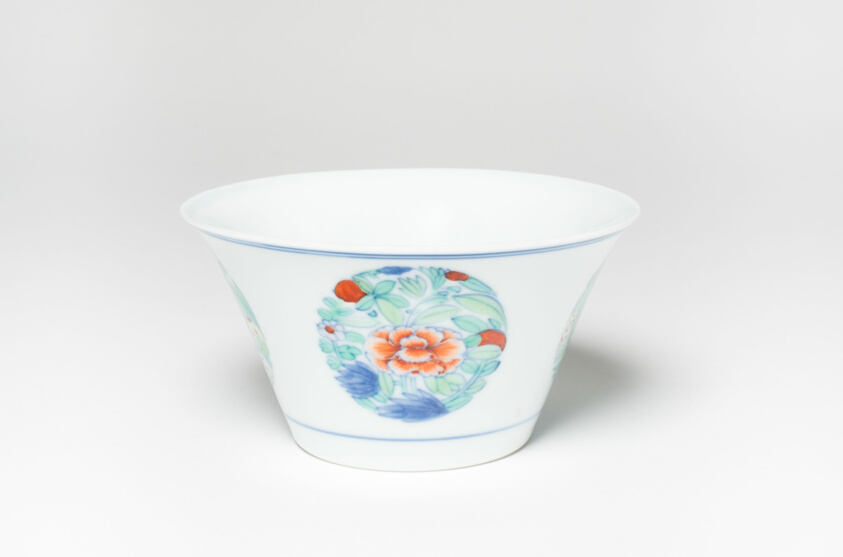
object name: Vessel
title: Bowl with Medallions of Flowers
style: Chinese (culture or style)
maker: China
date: Qing dynasty (1644–1911), Kangxi (1662–1722) or Yongzheng period (1723–1735), late 17th / early 18th century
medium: Porcelain painted in underglaze blue, red, and green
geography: China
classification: bowl; porcelain; dish (vessel); asian art; ceramics; vessel